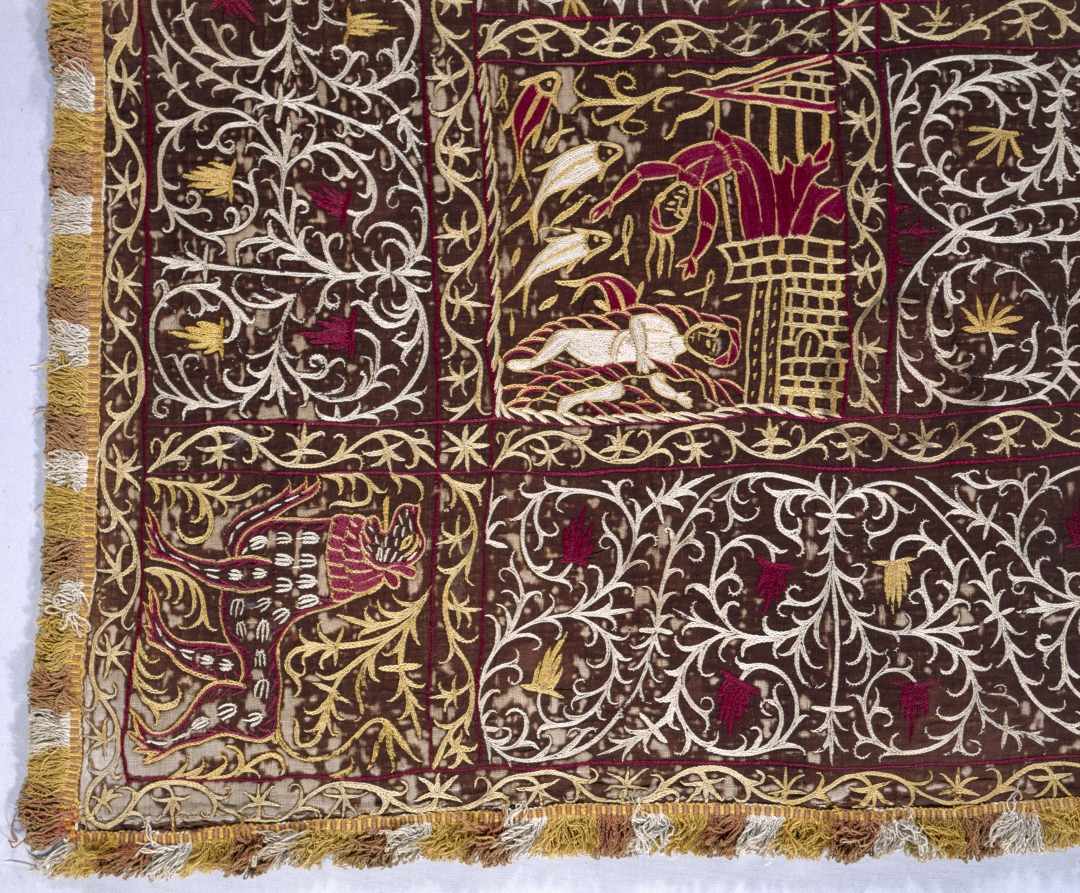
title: Bedspread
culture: India, Goa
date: 1600s–1700s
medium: Silk on cotton; embroidery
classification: Embroidery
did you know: The design features biblical scenes with Indian mythological characters and Portuguese-costumed figures embroidered in chain stitch.